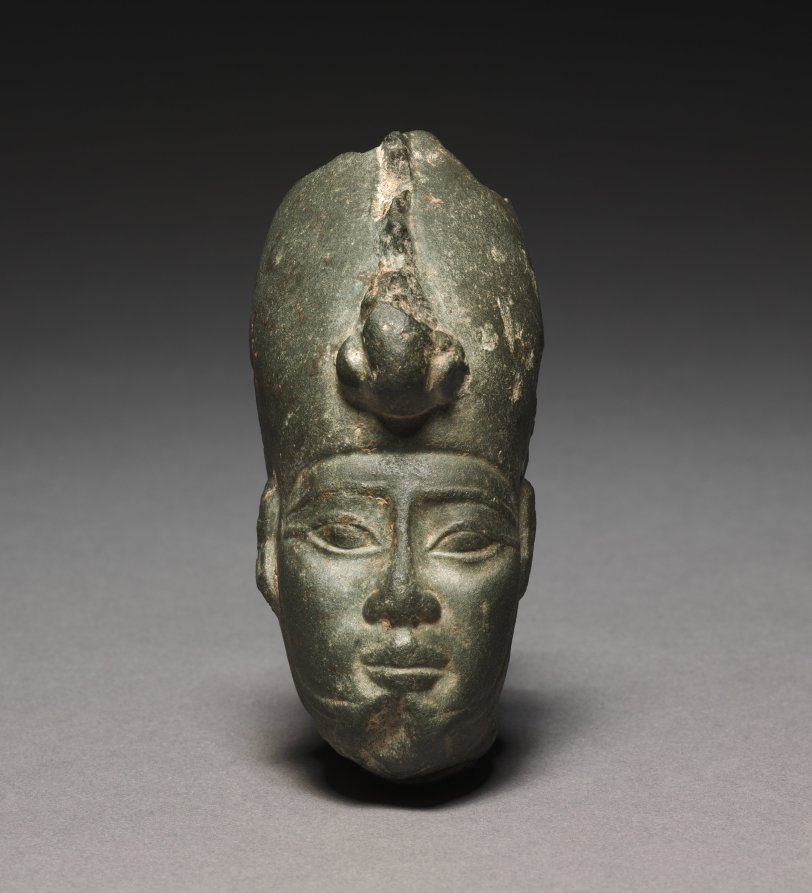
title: Head of a King or Osiris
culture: Egypt, Modern forgery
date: 1900–1915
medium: graywacke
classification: Sculpture